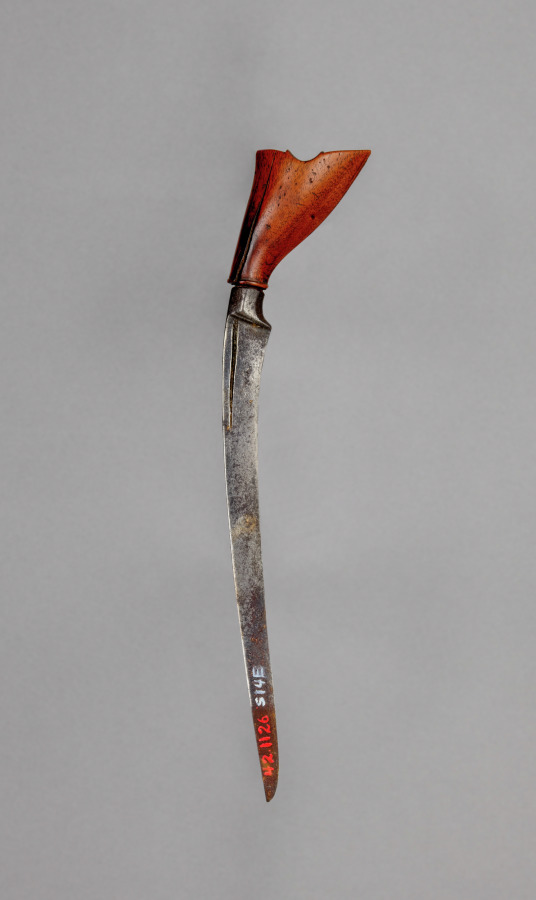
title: Knife (Kris)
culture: Indonesia or Malaysia, Early 20th century (?)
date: c 1900– 1925 ?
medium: metal, wood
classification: Arms and Armor